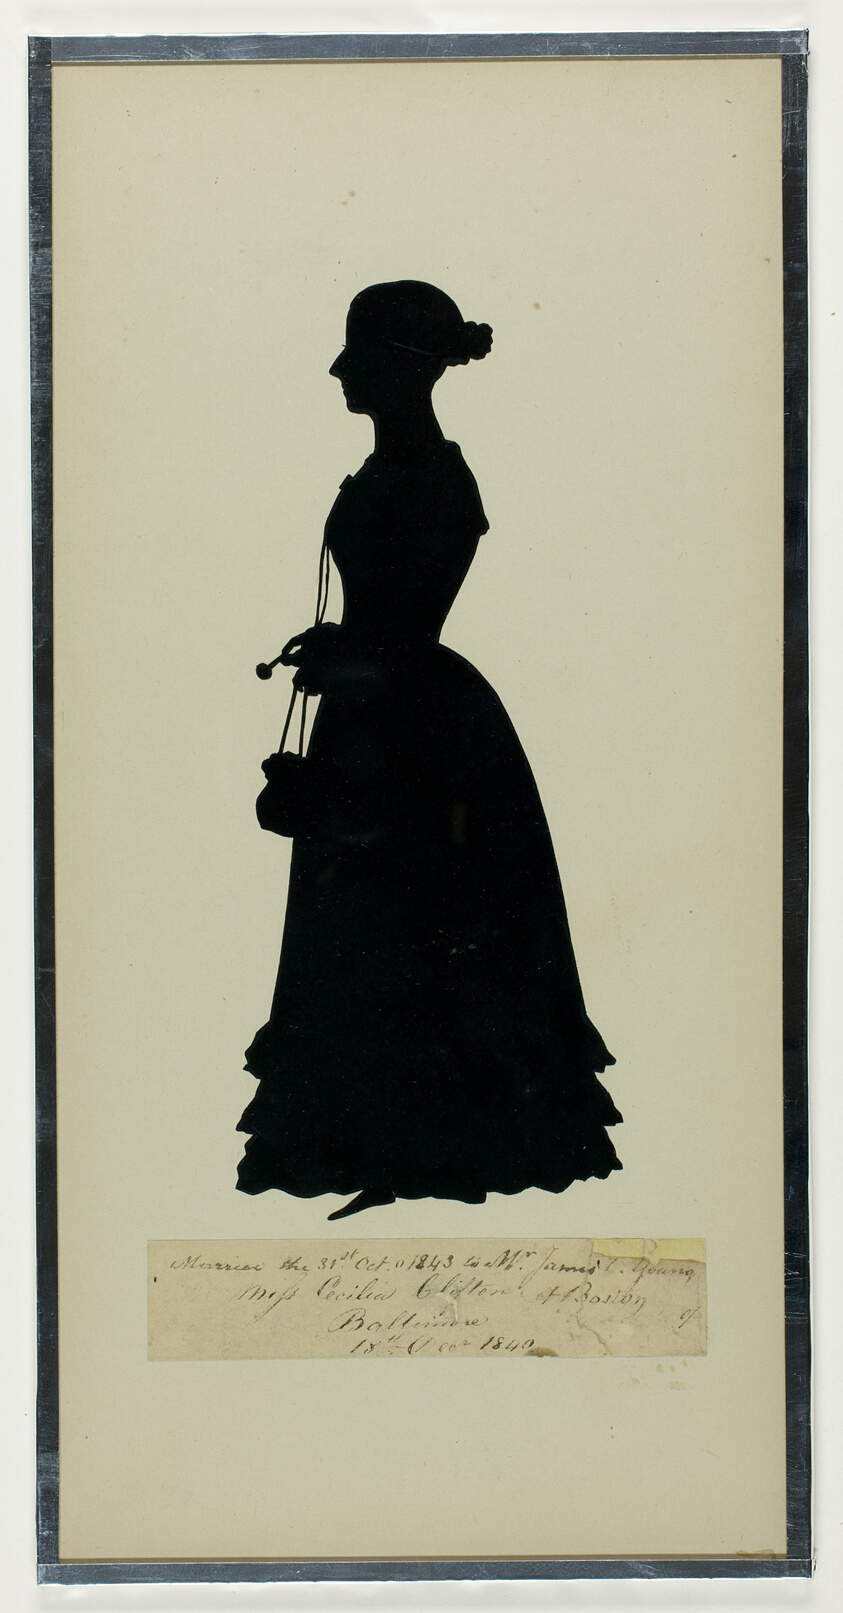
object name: Drawing and Watercolor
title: Miss Cecilia Clifton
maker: Auguste Edouart (French, 1789-1861)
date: December 18, 1840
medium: Cut paper silhouette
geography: France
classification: silhouette; prints and drawing; paper